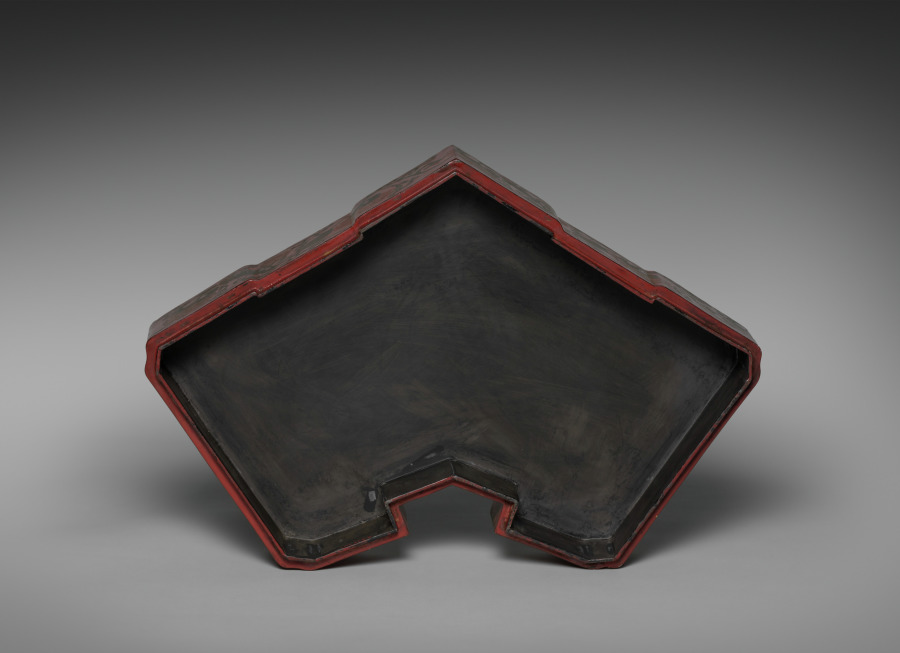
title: Upper Tier Box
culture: Japan, Edo period (1615–1868)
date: late 1700s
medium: red lacquer over a wood core, with litharge painting and engraved gold designs (Ryukyuan)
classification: Lacquer